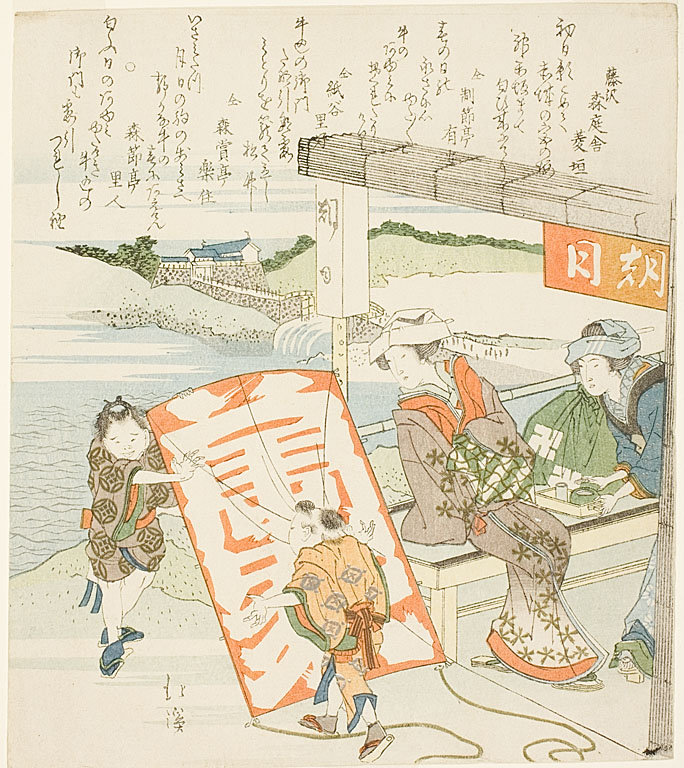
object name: Print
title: Women Watching Children Flying Kites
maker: Totoya Hokkei (Japanese, 1780-1850)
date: early 19th century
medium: Color woodblock print; surimono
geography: Japan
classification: woodblock print; print; asian art